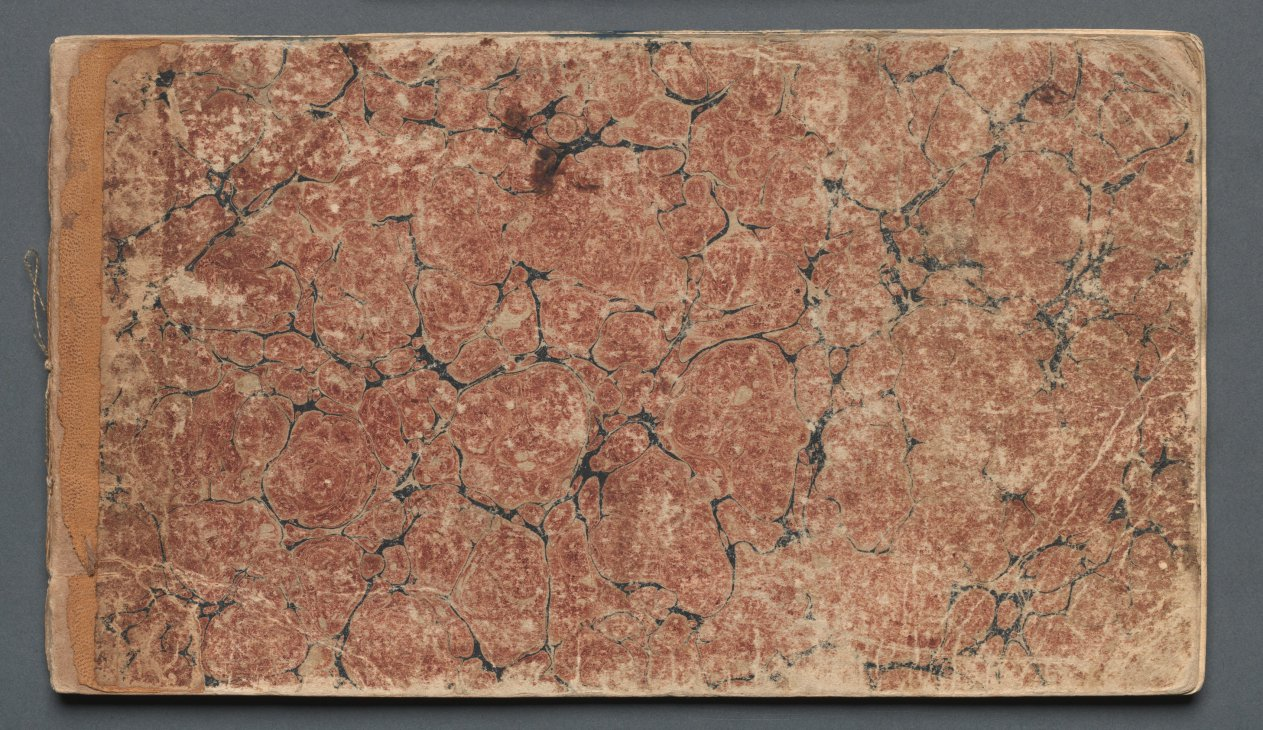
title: Sketchbook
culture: England, 19th century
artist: Samuel Prout (British, 1783–1852)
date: 1814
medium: graphite with gray and brown wash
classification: Bound Volume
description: John Ruskin (also in this gallery) admired Prout’s strength as a draftsman. Like the topographical watercolorists of the 18th century, Prout emphasized form over color in his watercolors, as is evident in the monochromatic, delicate English views in this sketchbook.